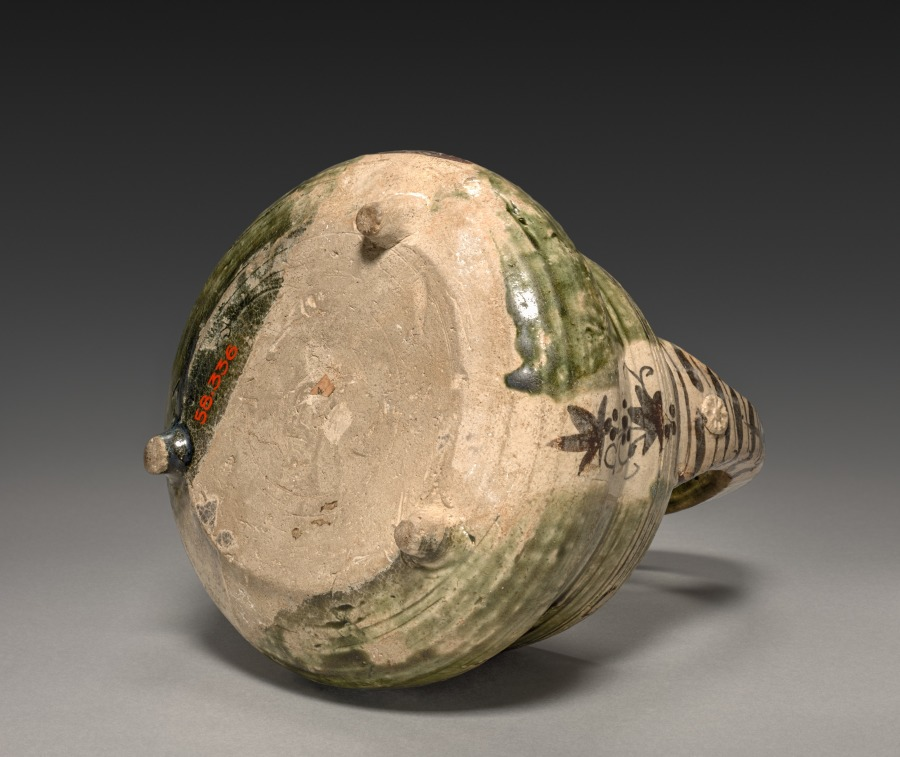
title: Ewer (Suichu)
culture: Japan, Momoyama period (1573–1615)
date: early 1600s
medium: Glazed stoneware with iron oxide underglaze slip (Mino ware, Oribe type)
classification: Ceramic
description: This ewer was made to replenish the jar that holds water for rinsing teabowls and filling the iron kettle at tea gatherings. Highly abstracted pine trees, cascading ivy, stripes, and grids make up the designs in underglaze iron oxide, while the overall surface alternates between a transparent glaze and a green glaze characteristic of some Oribe tea wares.